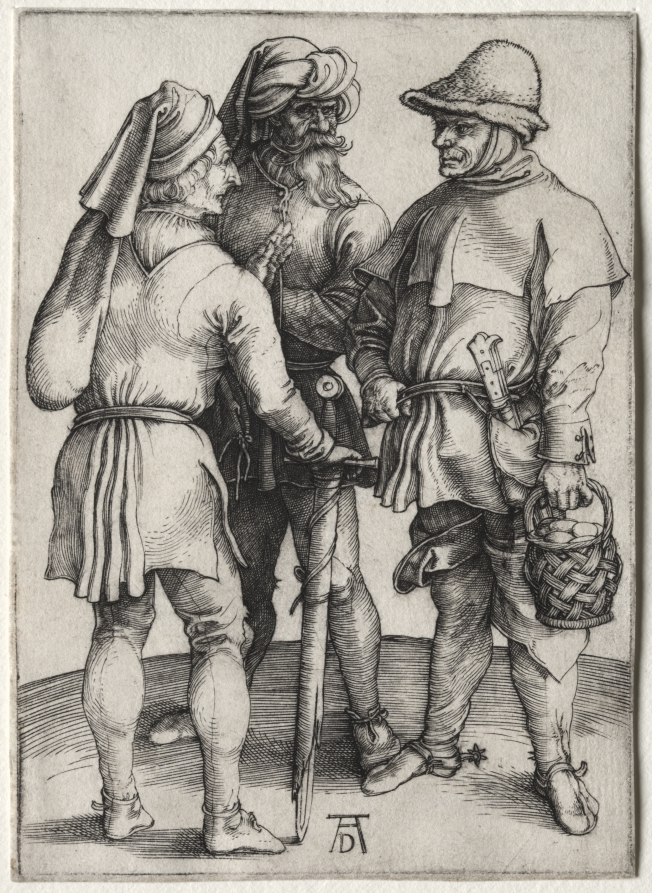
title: Three Peasants in Conversation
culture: Germany, late 15th Century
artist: Albrecht Dürer (German, 1471–1528)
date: c. 1497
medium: engraving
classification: Print